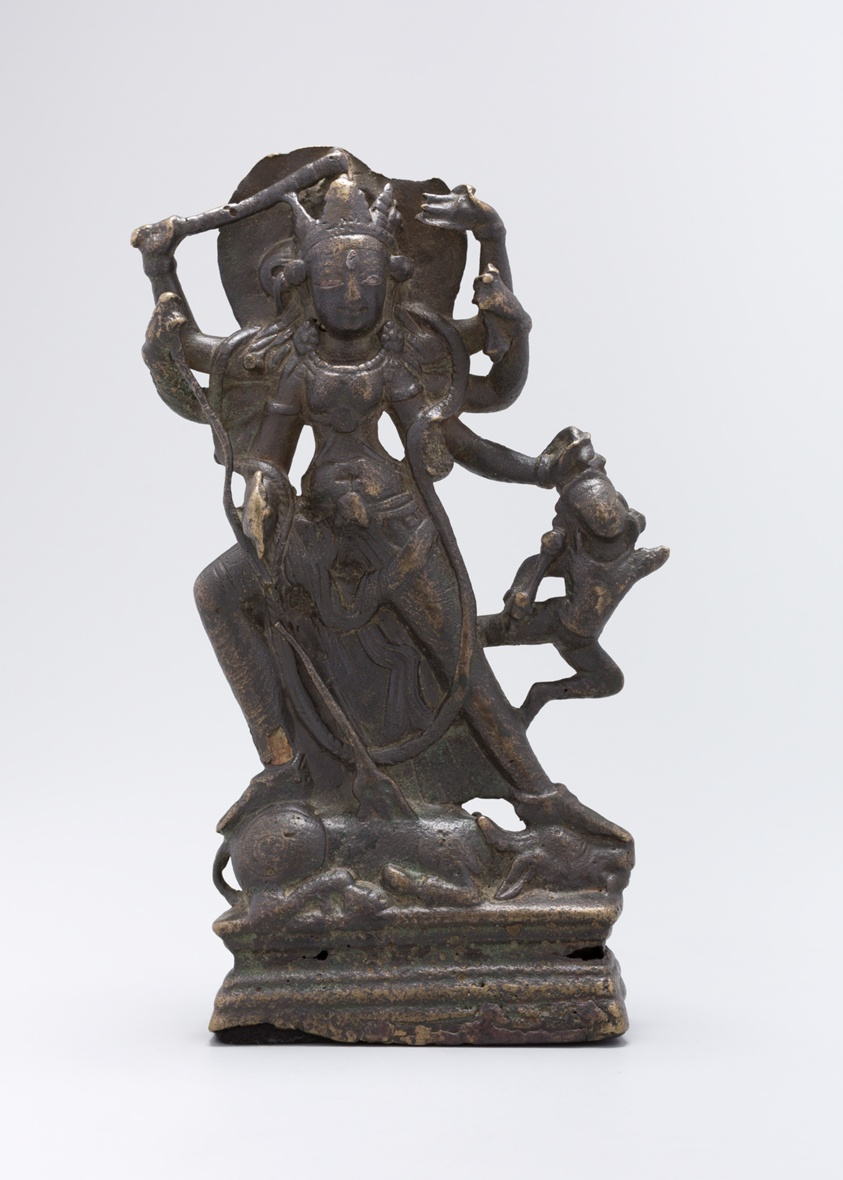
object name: Sculpture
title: Goddess Durga Slaying the Buffalo Demon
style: South Asian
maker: India or Pakistan; Kashmir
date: 9th century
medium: Bronze inlaid with silver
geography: Kashmir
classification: bronze; metal; sculpture; asian art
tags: Durga, Hindu, goddesses, gods (deities)